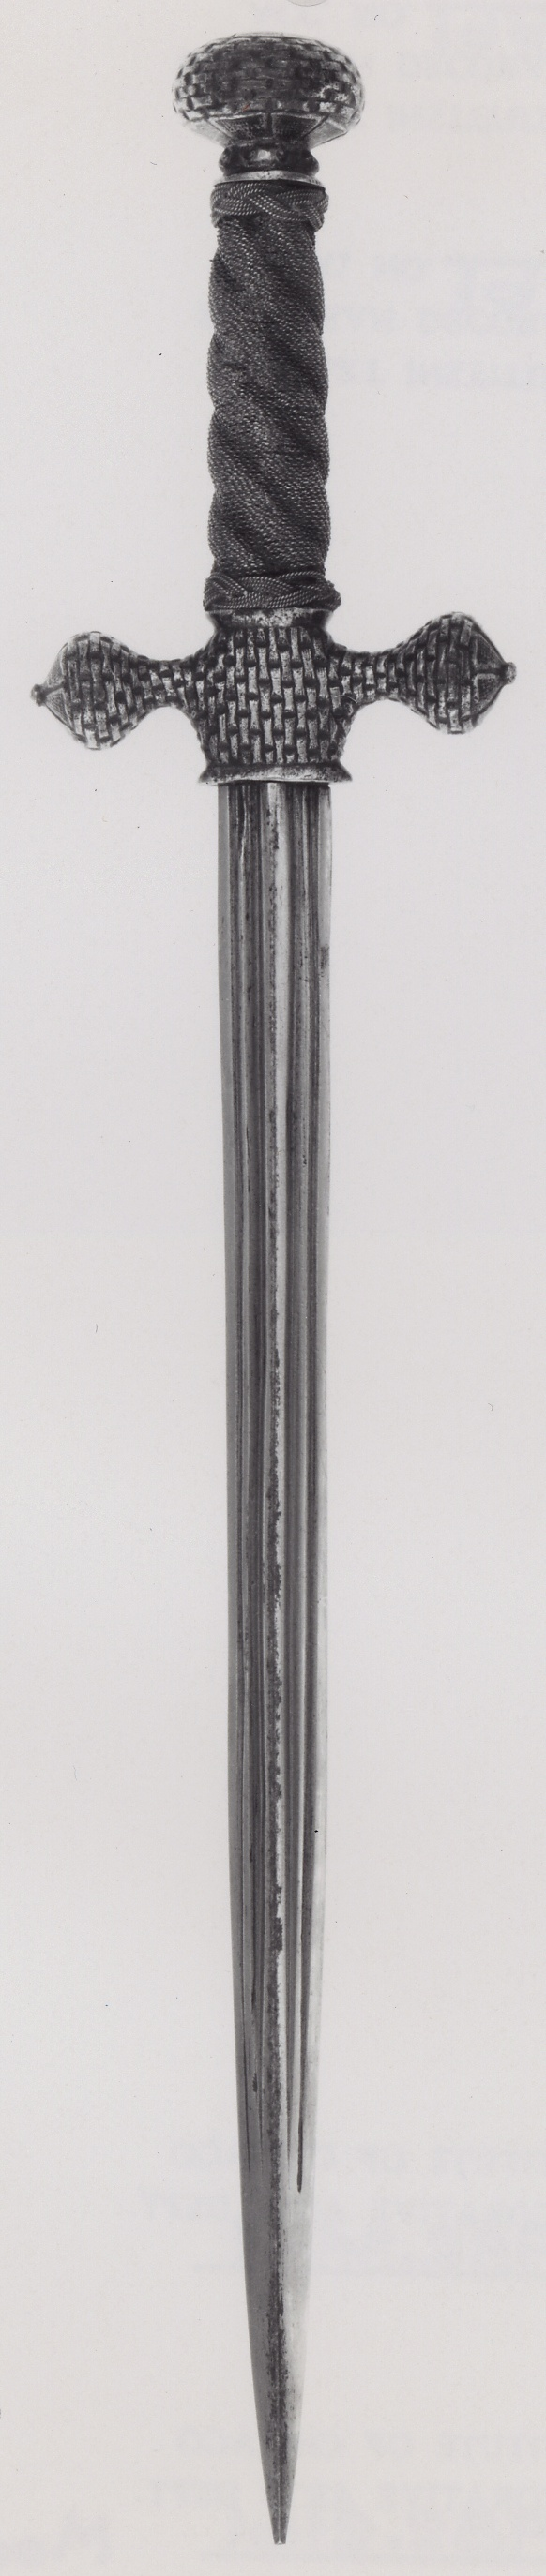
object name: Arms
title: Quillon Dagger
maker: European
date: third quarter of 17th century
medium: Steel, wood, and iron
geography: Europe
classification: edged weapon-dagger; arms; arms and armor